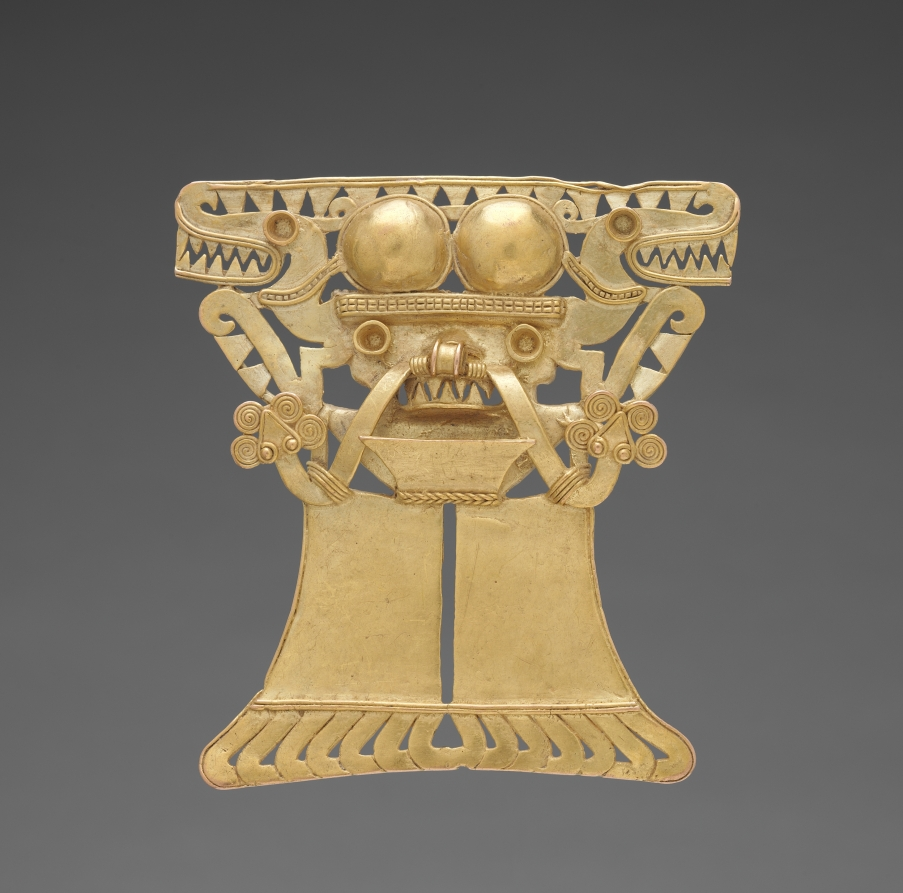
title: Animal-Headed Figure Pendant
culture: Panama, Veraguas or Parita style, c. 1000-1550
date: c. 1000–1550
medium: cast gold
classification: Metalwork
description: The culture area that extends from southern Central America to northern South America is generally referred to as the Intermediate Region because of its location between the two high culture zones of Mesoamerica and the central Andes. Research to date indicates that the pre-Columbian peoples of the Intermediate Region were organized into small, competitive chiefdoms, rather than large-scale states or empires. Despite political competition and warfare, trade in prestige goods such as jade and gold was common. Gold, obtained through panning and mining, was worked by hammering and lost-wax casting to produce intricate and showy personal ornaments. The pendant represents a supernatural being, perhaps a fantastic crocodilian. It has projecting, tubelike eyes, a snout full of sharp teeth, and snake-headed streamers emanating from the nostrils. The simplified lower body consists of broad, flat legs, with large, curved talons at the ends of the feet. The elaborate headdress includes two central semidomes, flanked by fierce-looking profile crocodilians.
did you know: The figure wears an elaborate headdress that is flanked by fierce-looking crocodilians in profile.